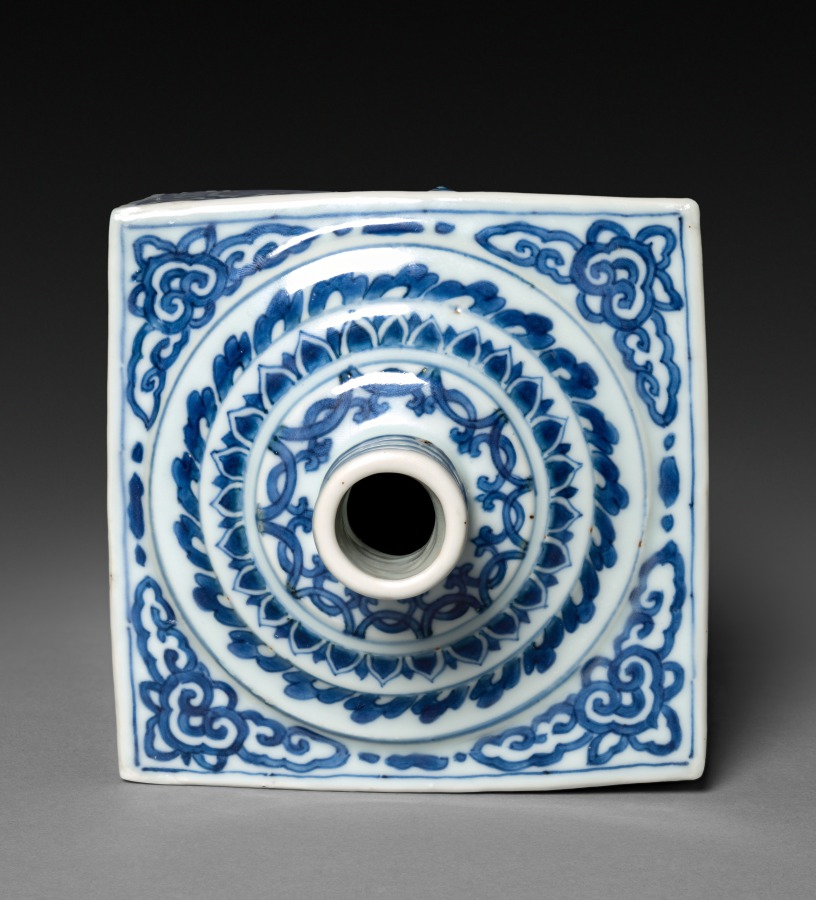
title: Transitional Blue-and-White Square Bottle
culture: China, Jiangxi province, Jingdezhen kilns, Ming dynasty (1368-1644), Chongzhen reign (1628-44) or Qing dynasty (1644-1911), Kangxi reign (1662-1722)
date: 1628–1722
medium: Porcelain with underglaze cobalt blue decoration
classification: Ceramic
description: The shape of this flask derives from European gin bottles. Its decoration in brilliant shades of blue with fantastic animal motifs—such as a leopard, the mystical qilin, a horse, and another imaginary beast—is characteristic of porcelain of the transitional period between the Ming and Qing dynasties when potters lost imperial patronage and experimented to find new clients in China and abroad.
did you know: This flask's square shape and design represents a departure from the earlier imperial Ming dynasty style, which is mostly ornamental and symmetrical.